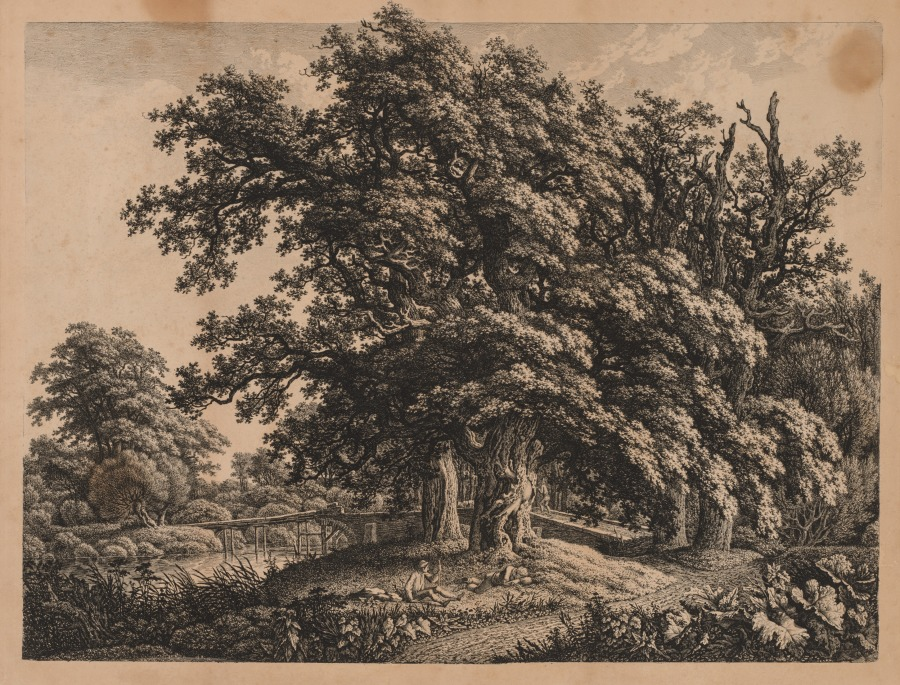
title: Landscape and Bridge with Three Figures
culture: Germany, 18th-19th century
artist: Carl Wilhelm I Kolbe (German, 1757–1835)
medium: engraving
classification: Print